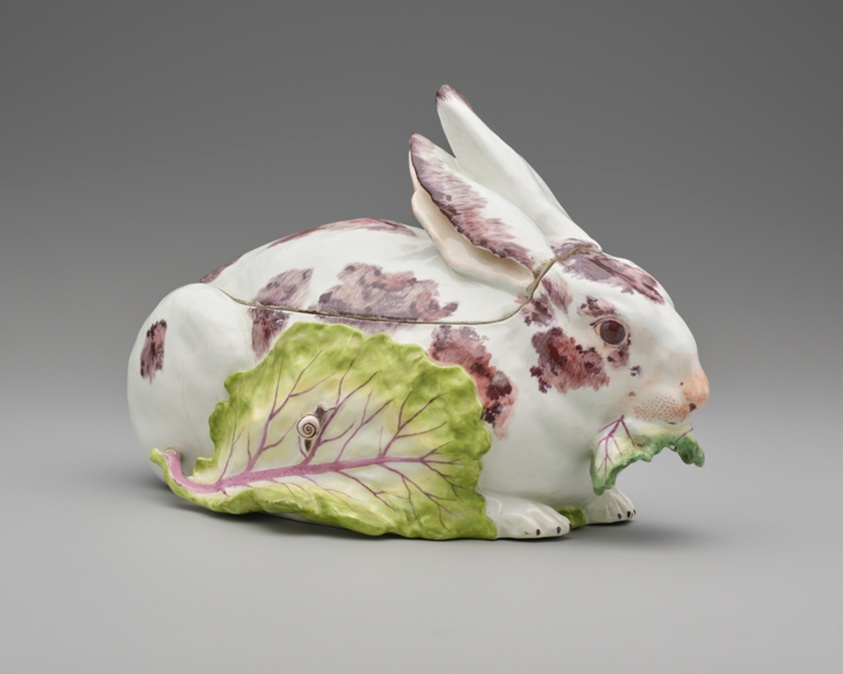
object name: Ceramics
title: Tureen in the form of a Rabbit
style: Rococo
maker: Chelsea Porcelain Manufactory; English, c. 1745–1784; London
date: 1755–56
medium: Soft-paste porcelain and polychrome enamels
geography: Chelsea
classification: tableware; porcelain; european decorative arts; ceramics